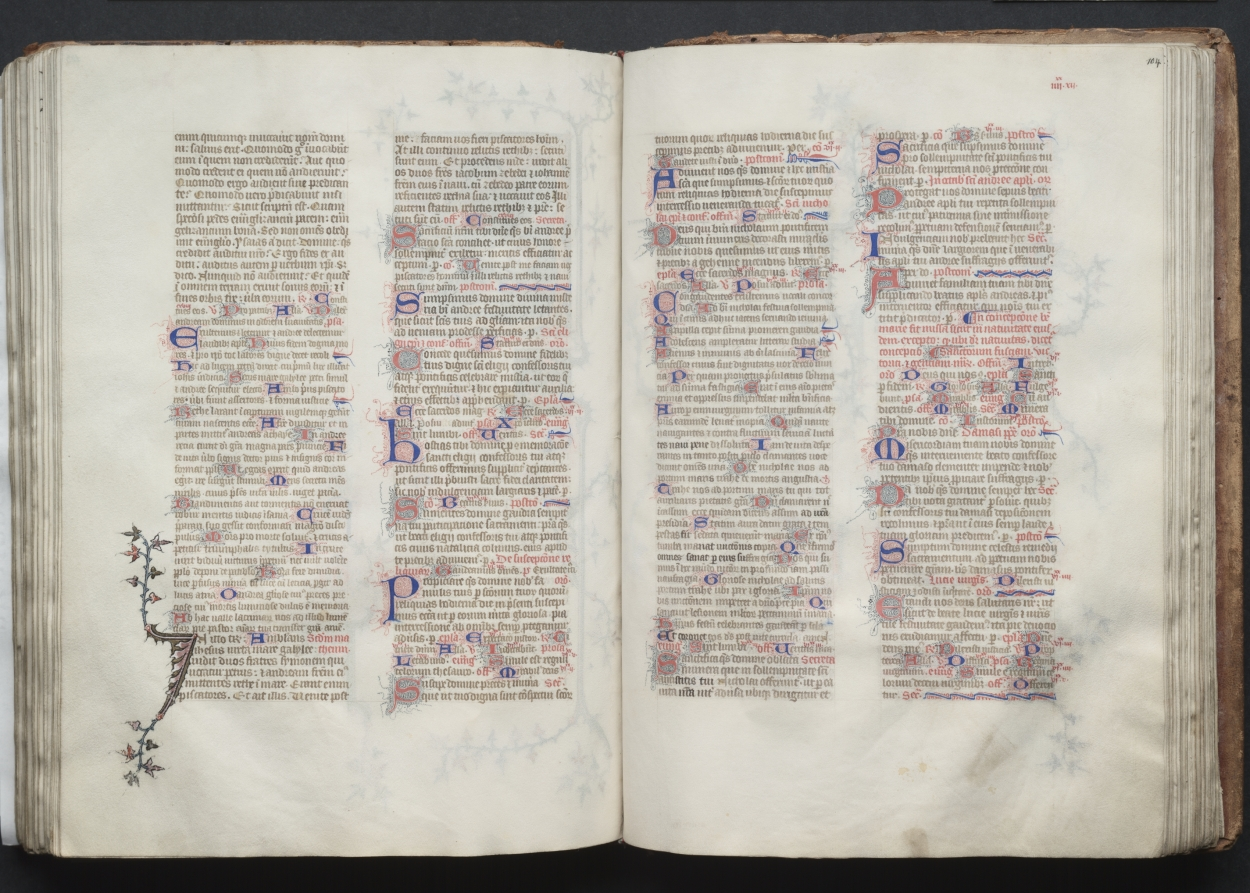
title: The Gotha Missal: Fol. 104r, Text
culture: France, Paris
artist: Master of the Boqueteaux (French)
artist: and Workshop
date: c. 1375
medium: ink, tempera, and gold on vellum; blind-tooled leather binding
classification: Bound Volume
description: The style and quality of this manuscript's decoration is typical of deluxe Parisian books made for aristocratic or royal patrons. Most of the book's decoration appears to be the work of the Master of the Boqueteaux, an artist active at the court of King Charles V (died 1380). His style was apparently shared by a number of book illuminators working in and around Paris. It is very possible that the Gotha Missal belonged to Charles V, but is not provable because the manuscript has no royal portraits and lacks a colophon. Given the book's magnificent decoration, however, it would seem that it was produced for a Valois prince, if not for the king himself. The manuscript receives its name from the German dukes of Gotha, its later owners.